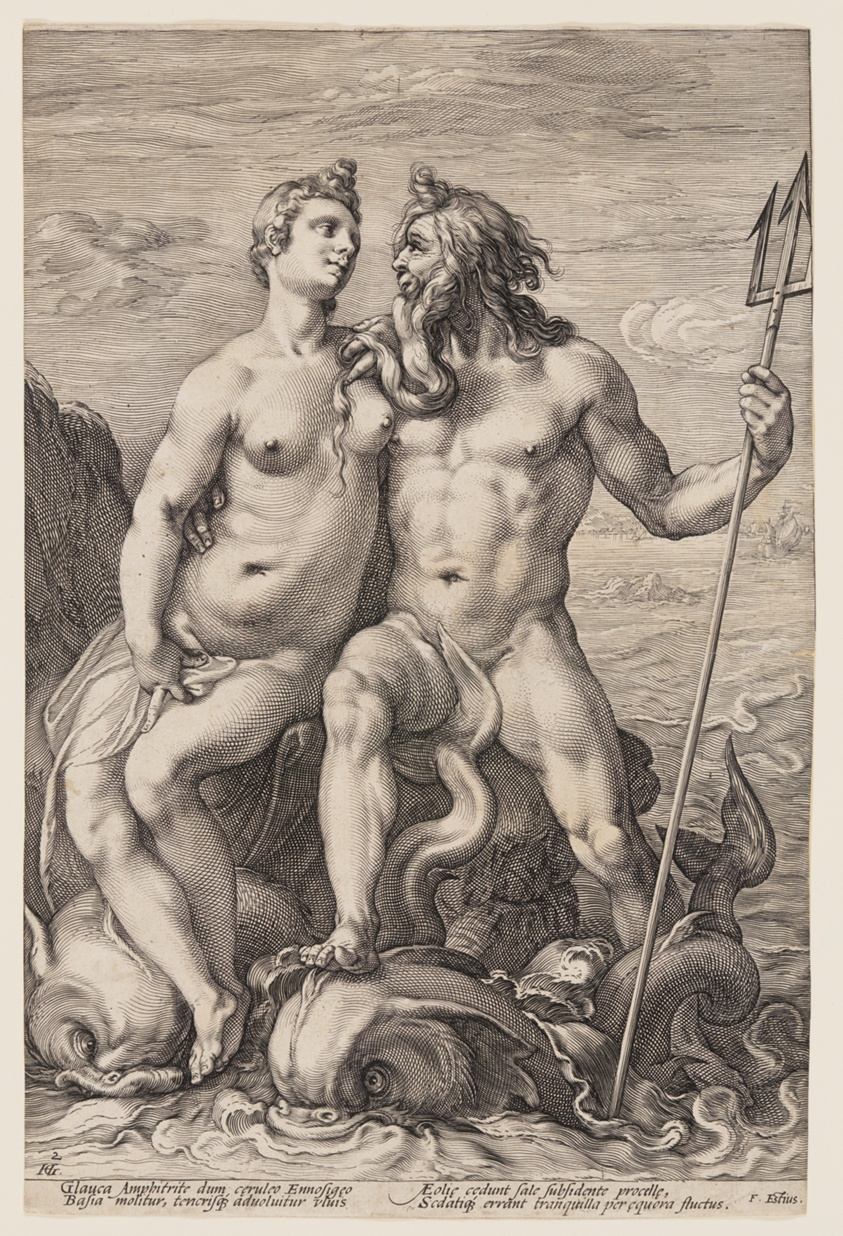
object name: Print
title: Neptune and Amphitrite, from Three Paired Gods and Goddesses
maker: Jan Saenredam (Dutch, 1565–1607); after Hendrick Goltzius (Dutch, 1558–1617)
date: c. 1594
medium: Engraving on ivory laid paper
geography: Netherlands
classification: engraving; paper; print; prints and drawing